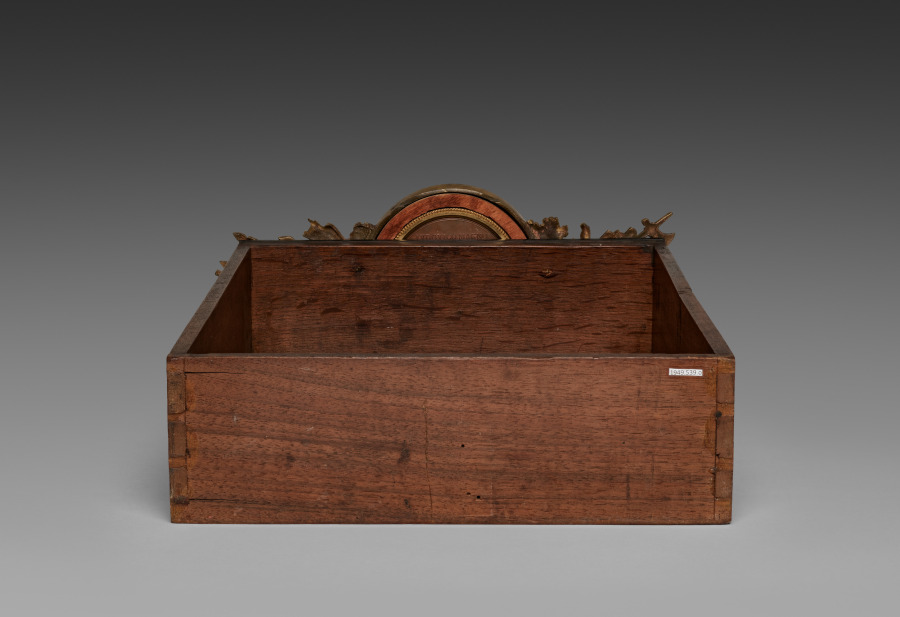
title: Center Drawer for Cabinet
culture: France, late 17th Century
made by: André-Charles Boulle (French, 1642–1732)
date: c. 1690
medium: ebony, marquetry in metal and tortoiseshell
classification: Furniture and woodwork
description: Appointed cabinetmaker to King Louis XIV in 1672, André-Charles Boulle became a master of furniture making in France during the late 1600s until his death in 1732. Known primarily for his use of marquetry, in which metal patterns are inlaid into tortoiseshell then applied within the veneered surface of the furniture, Boulle established a level of quality and craftsmanship few others could achieve. As a result, his work found favor at the royal court and among other aristocrats and diplomats eager to impress the king. The inclusion of a medallion depicting Louis XIV within the bronze decoration of this chest would have identified the owner with the royal court. Often exhibiting stout architectural proportions with elegant groups of inlaid motifs such as the parrot on the central panel of this chest, Boulle’s designs are an example of the intellectual fashion for contrasting ideas, materials, and motifs.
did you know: Originally designed to sit atop an elaborate tall stand, this chest was likely altered in the late 1700s to reduce its scale and height.